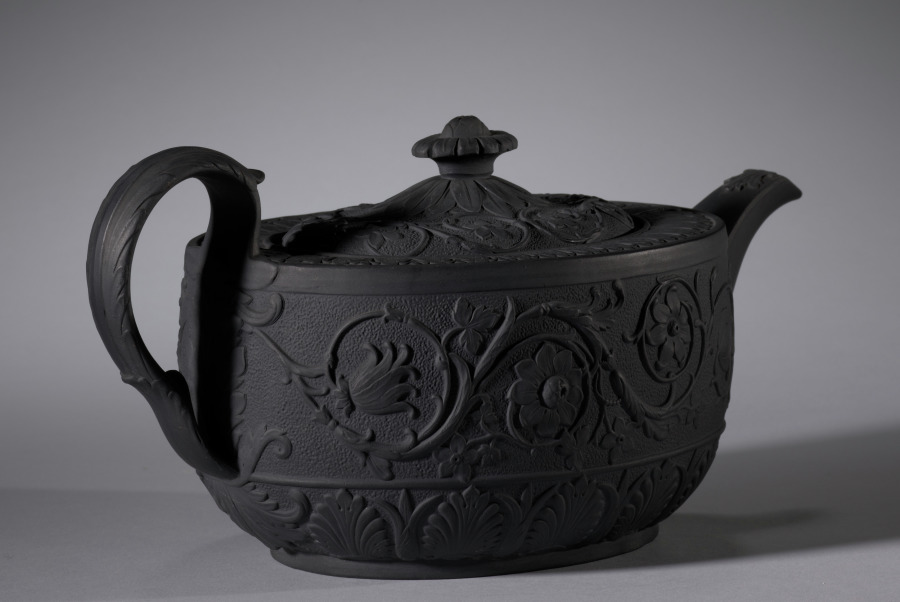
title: Teapot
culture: England, 19th century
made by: Elijah Mayer & Son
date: c. 1810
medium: black basalt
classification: Ceramic